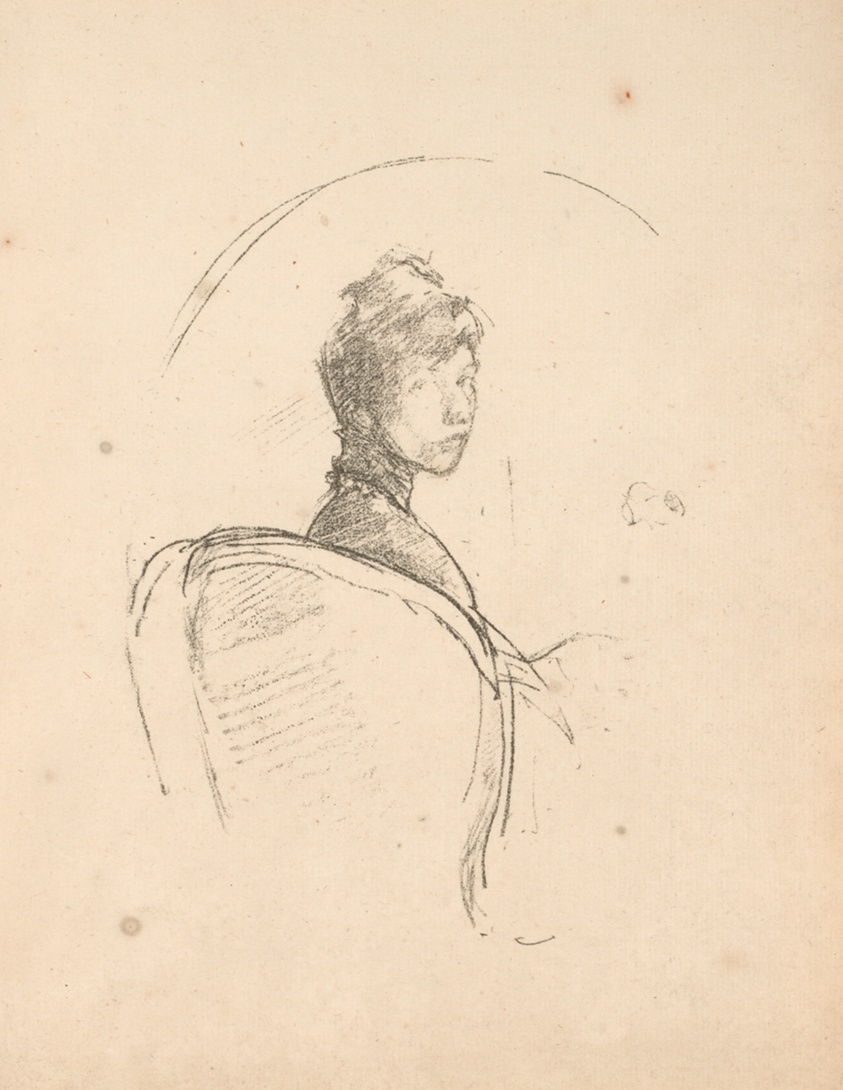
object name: Print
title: Portrait Study: Miss Rosalind Birnie Philip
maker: James McNeill Whistler (American, 1834-1903)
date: 1896 (only printed posthumously 1903)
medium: Transfer lithograph in black ink on cream laid paper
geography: United States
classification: print; transfer lithograph; lithograph; prints and drawing; paper